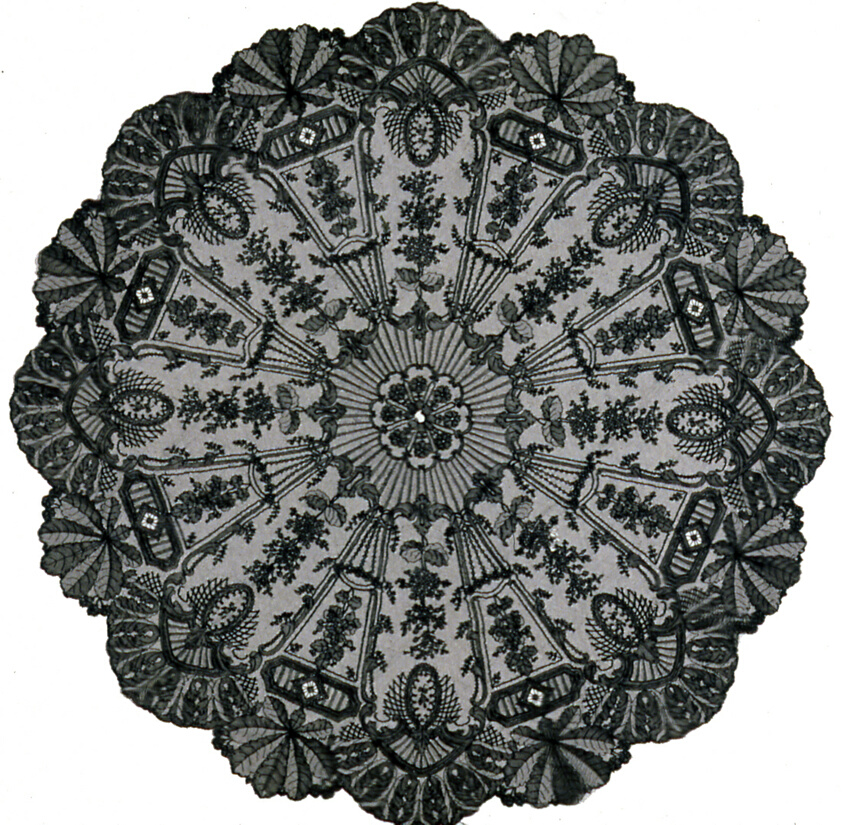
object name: Textile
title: Parasol Cover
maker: France, Chantilly or Bayeux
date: 1850s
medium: Silk, bobbin straight lace (made in strips)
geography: France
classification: textile; lace - bobbin